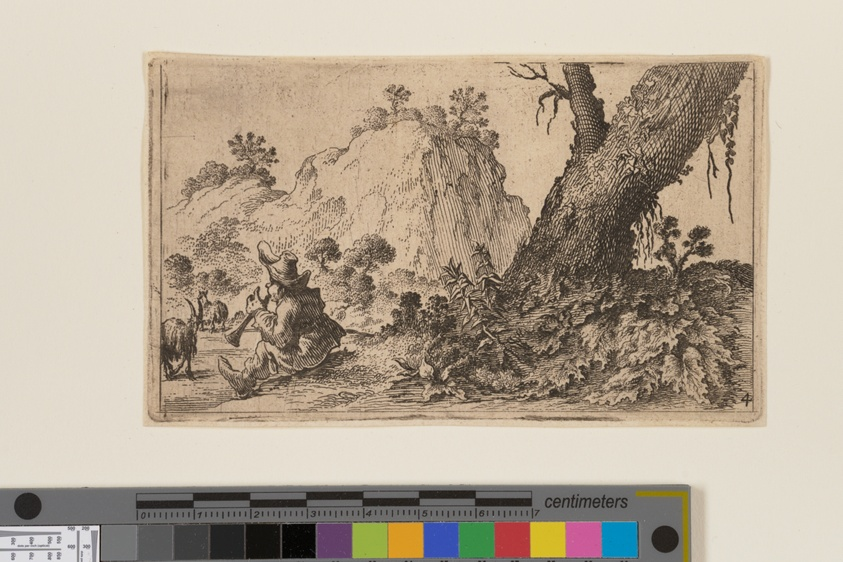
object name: Print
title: Shepherd Playing a Recorder to a Flock of Goats, from Twelve Landscapes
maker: Gillis van Scheyndel (Dutch, 1595–1660)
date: c. 1605-1650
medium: Etching on ivory laid paper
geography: Netherlands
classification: etching; paper; print; prints and drawing